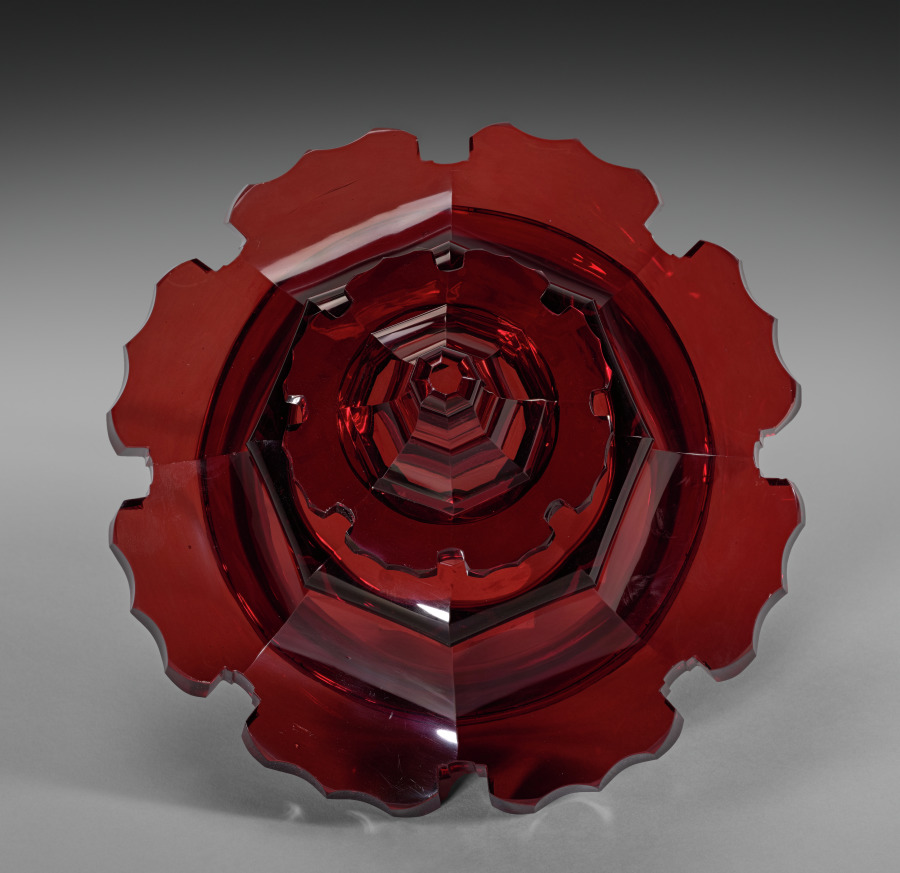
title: Cover for a Cup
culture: Bohemia, 19th century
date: mid-1800s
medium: ruby glass with engraved decoration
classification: Glass